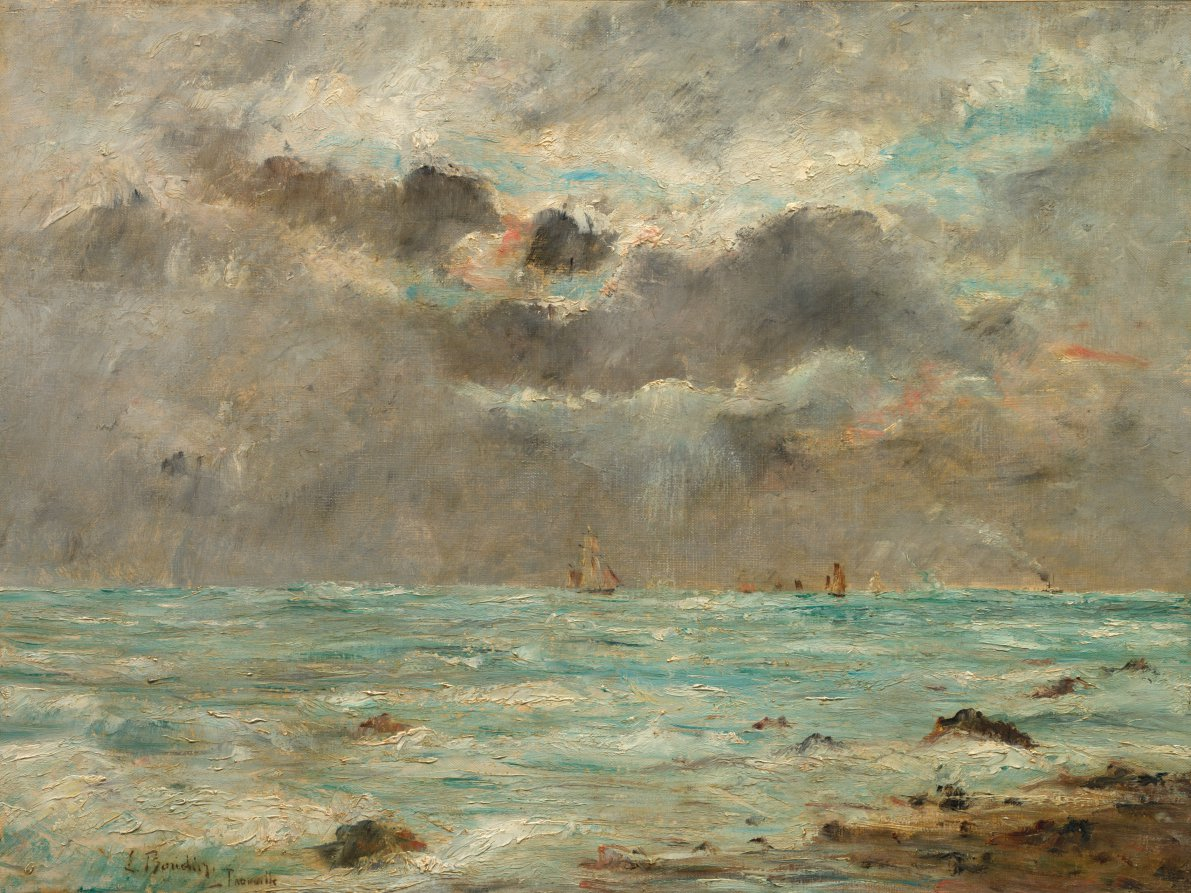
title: The Coast at Trouville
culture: France, 19th century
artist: imitator of Eugène Boudin (French, 1824–1898)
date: c. 1865–1900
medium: oil on fabric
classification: Painting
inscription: Signed lower left: E. Boudin / Trouville